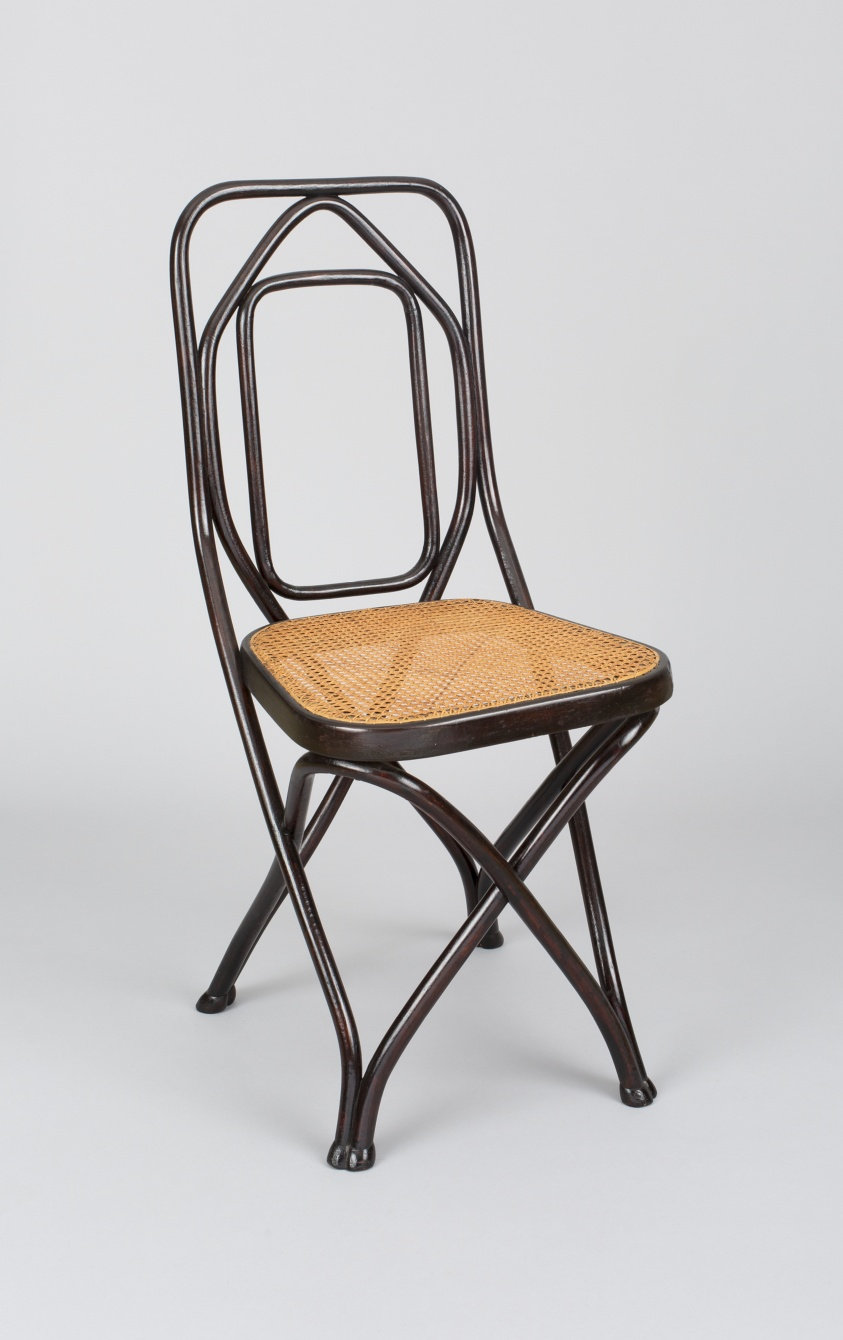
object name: Furniture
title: Side Chair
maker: Designed by August Thonet; Austrian, 1853-1921; Made by Gebrüder Thonet; Austrian, 1853-1921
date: Designed c. 1885; Made c. 1900/15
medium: Beech, cane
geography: Austria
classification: chair; seating; furniture; european decorative arts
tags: furniture